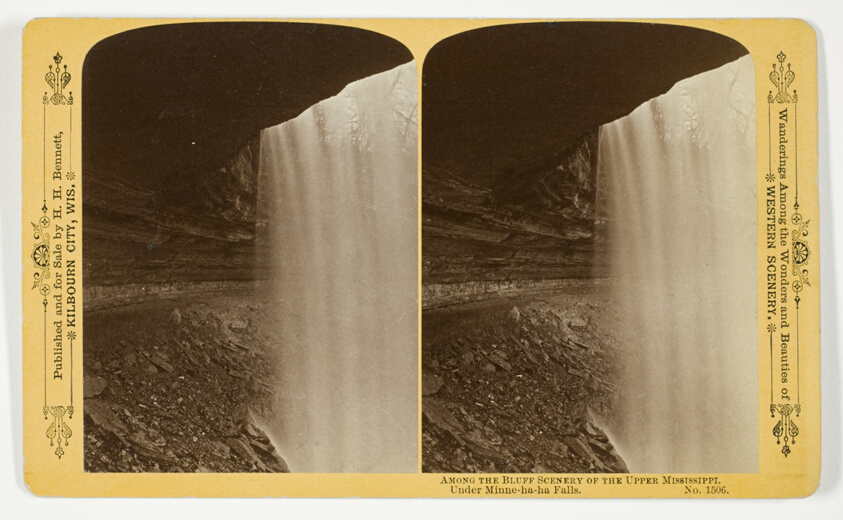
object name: Photograph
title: Under Minne-ha-ha Falls, No. 1506 from the series "Among the Bluff Scenery of the Upper Mississippi"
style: 19th century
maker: Henry Hamilton Bennett (American, born Canada, 1843-1908)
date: 1870/1908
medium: Albumen print, stereo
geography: Wisconsin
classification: photography; photograph; albumen silver print; stereograph (albumen)